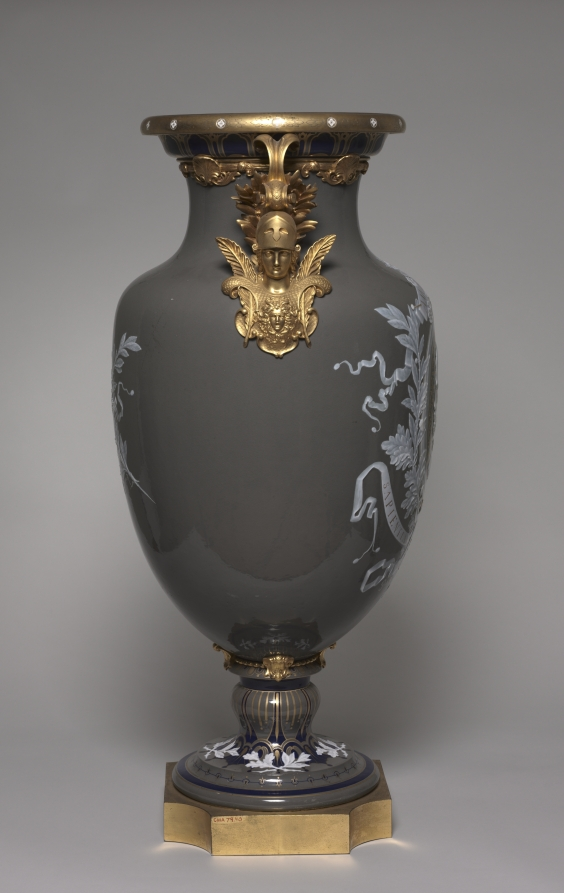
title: Vase with Portrait of President MacMahon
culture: France, 19th century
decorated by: Alfred-Thompson Gobert (French, 1822–1894)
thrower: Constantin Renard (French)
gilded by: Emile-Bernard Rejoux (French, 1832-)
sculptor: Jean-Denis Larue (French, 1884)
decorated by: Jules Archelais (French, 1865–1902)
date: c. 1872–1874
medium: porcelain with gilt bronze mounts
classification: Ceramic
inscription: incised gilded letters located directly below portrait relief: "MACMAHON"; incised gilded letters located in complex design of ribbons above portrait: "AMOR PATRIA," and below: "SAPIENTIA," "FORTITUDO"; on primary face, beneath the ornamental surround of MacMahon's portrait: "Gob. R/Sèvres"; on reverse, incised gilt numerals located within ornamental ribbon: "1873"; incised in the porcelain inside neck: "CR 72 6" and beneath it "CR 72 9"; incised letters beneath the vase: "NL"; a small gilt-metal bucket is installed within the neck of the MacMahon Vase, on its bottom are scratched the letters: "ABF"; printed in green inside the neck and beneath the vase: "s 74"; printed in red on the lip: a circular stamp with the words "Decore a Sèvres 74" surrounding the initials "RF" [Repbulique Français].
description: Marie Edmé Patrice Maurice de MacMahon (1808-1893), whose portrait appears on this vase, was its first owner. He was a successful military leader who was given the titles of Duke of Magenta and Marshall of France by Napoleon III, but after France's defeat in the Franco-Prussian War of 1870-71 and the end of the Second Empire, MacMahon was elected second President of the Third Republic of France.